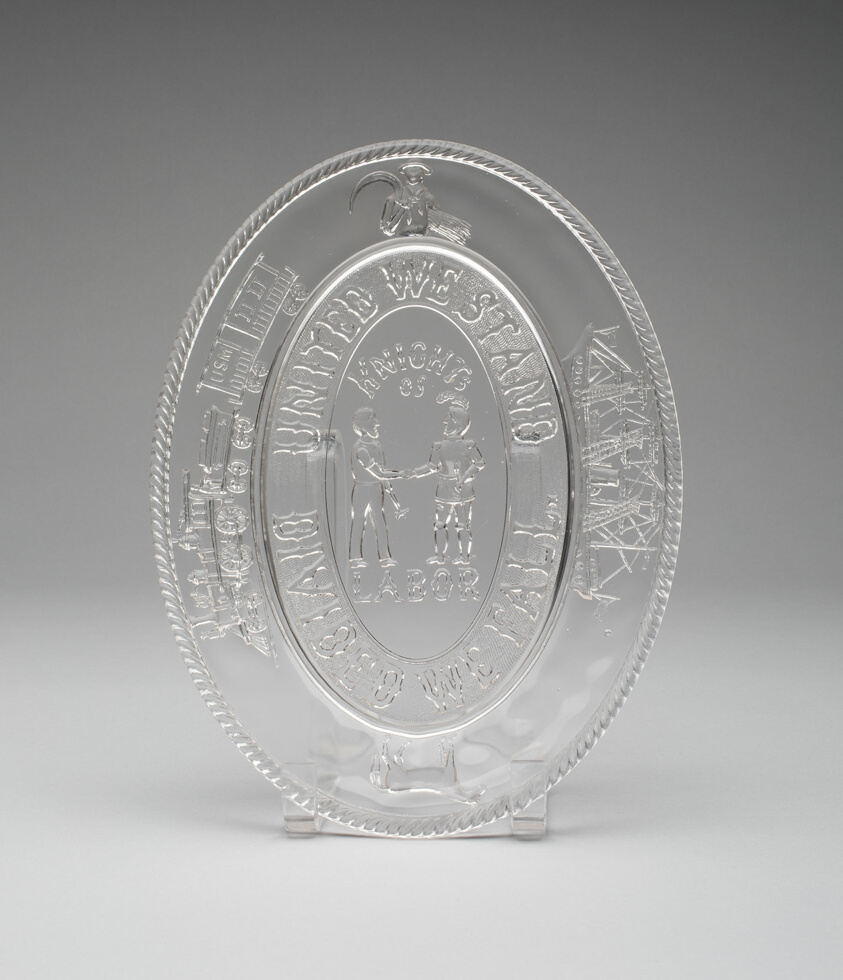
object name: Glass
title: Platter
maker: Artist unknown (American, 19th–20th century)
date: 1870–1900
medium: Glass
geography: United States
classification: vessel for serving food; glass; american decorative arts; american arts; decorative arts